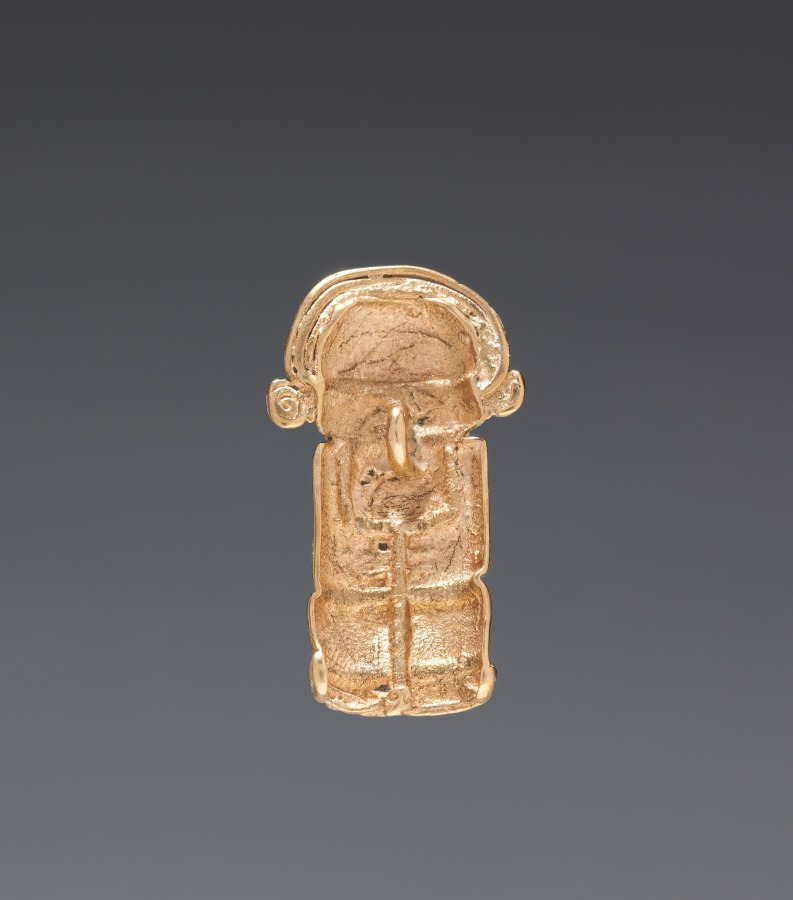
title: Necklace Figurine Bead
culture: Colombia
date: 1–700 CE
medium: cast gold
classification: Jewelry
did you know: Working with gold dates back to at least 500 BC in Ecuador and Colombia.